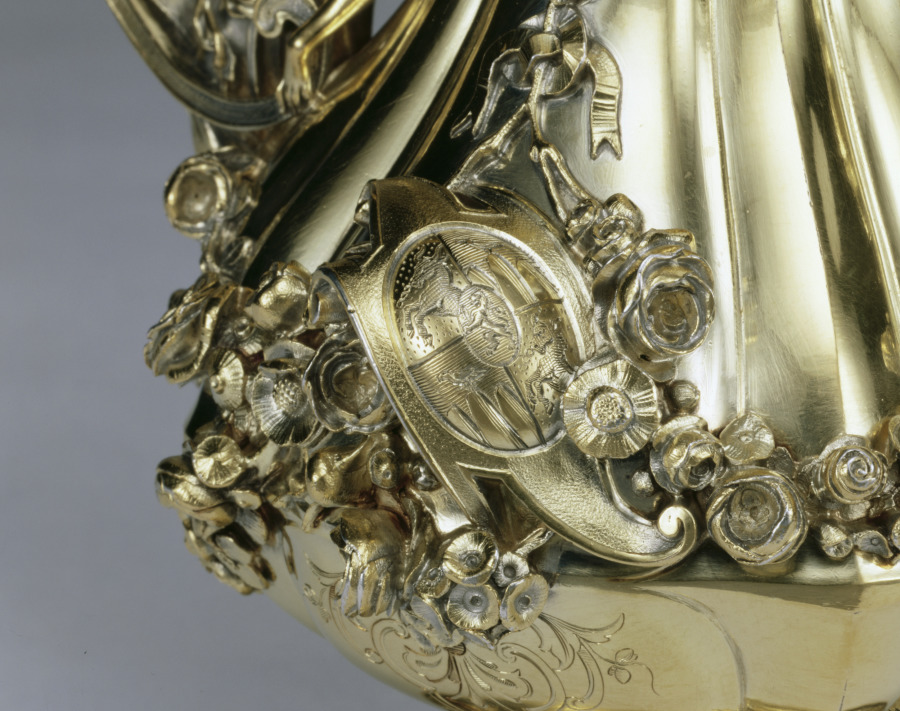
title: Covered Jug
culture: France, 19th century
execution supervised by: Jean-Valentin Morel (French, 1794–1860)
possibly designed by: Jules Dieterle (French, 1811–1889)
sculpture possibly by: Jules Klagmann (French, 1810–1867)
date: c. 1845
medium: gilded silver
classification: Silver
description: The elegance and richness of this ewer demonstrate the high level of technical mastery achieved by its maker. Morel studied under his father, a Parisian lapidary (someone who cuts, polishes, and engraves hard stones), and with Adrien Vachette, a maker of gold boxes. In 1842 he went into partnership with Charles-Edmond Duponchel, which lasted until the late 1840s, at which time he established himself in London, remaining there until 1852, when he returned to Paris. Morel frequentlyfollowed the designs of others, and it has been suggested that in the case of this pitcher his well-known contemporary, Jules Dieterle (1811-1889), may have conceived the overall form. The female figure seems to have been based on a design by the sculptor Jules Klagmann (1810-1867).